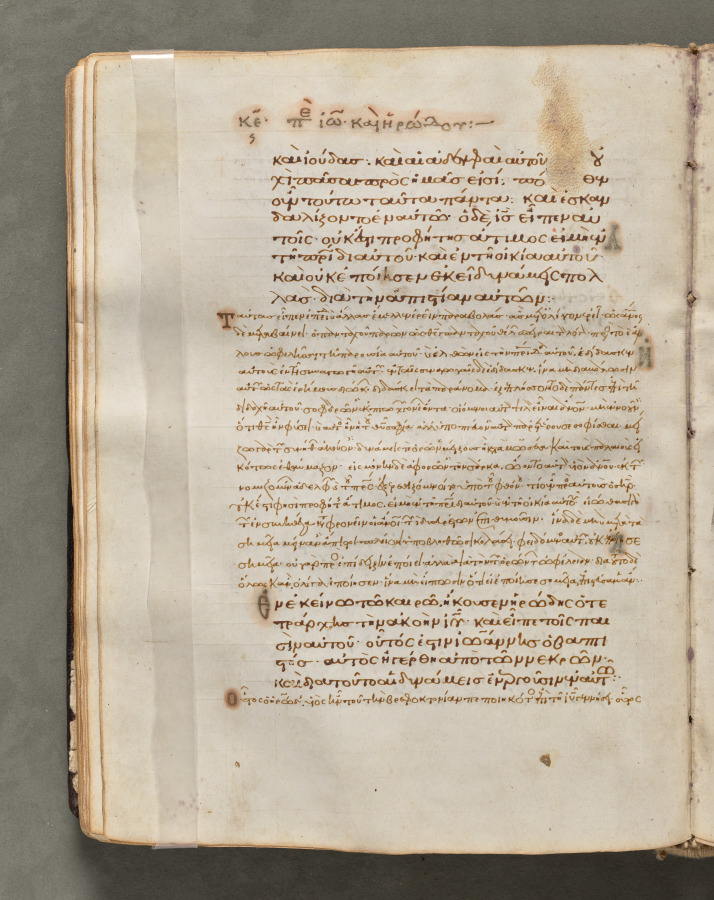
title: Text, folio 63 (verso), from a Gospel Book with Commentaries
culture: Byzantium, Constantinople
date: c. 1000–1100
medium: ink, tempera, and gold on vellum; leather binding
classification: Bound Volume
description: Each of the four gospels in this book opens on a page with brilliantly illuminated borders depicting the author of the text as well as birds-principally peacocks, symbols of the immortality of the soul-and fountains, representing the fountain of life and the salvation of the soul. This volume consists of 428 leaves with texts in Greek. Its level of sophistication suggests that it was probably written and decorated in a monastery in Constantinople.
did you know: Gospel Books were carried in procession through Byzantine churches.